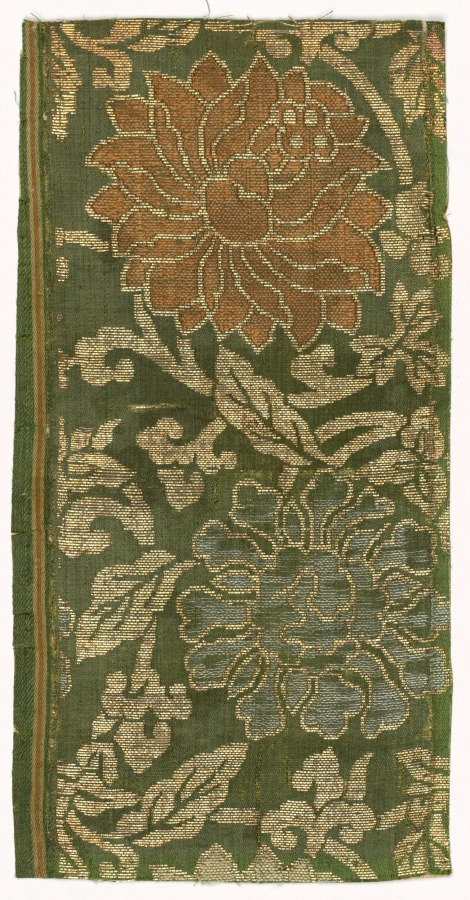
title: Textile Fragment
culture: Japan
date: 1800s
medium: silk, metallic thread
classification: Textile